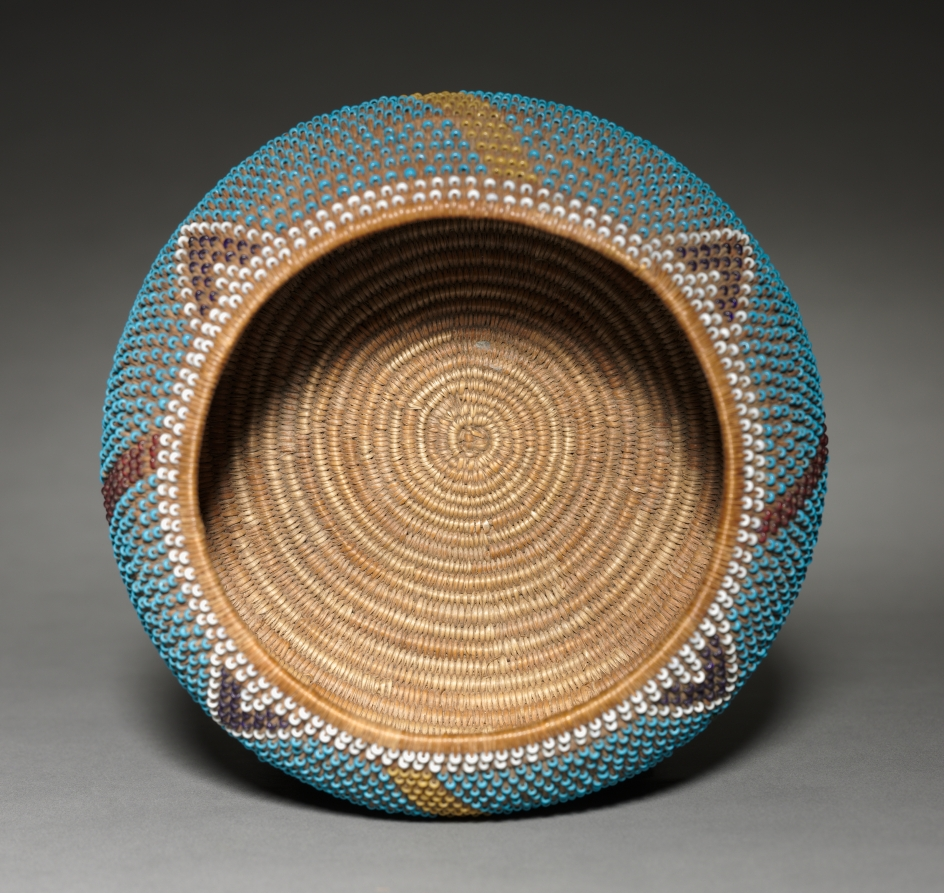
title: Gift Bowl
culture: California, Wappo, late 19th- early 20th century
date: c. 1890– 1905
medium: Sedge with beads; coiled ( 3 rods)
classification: Basketry